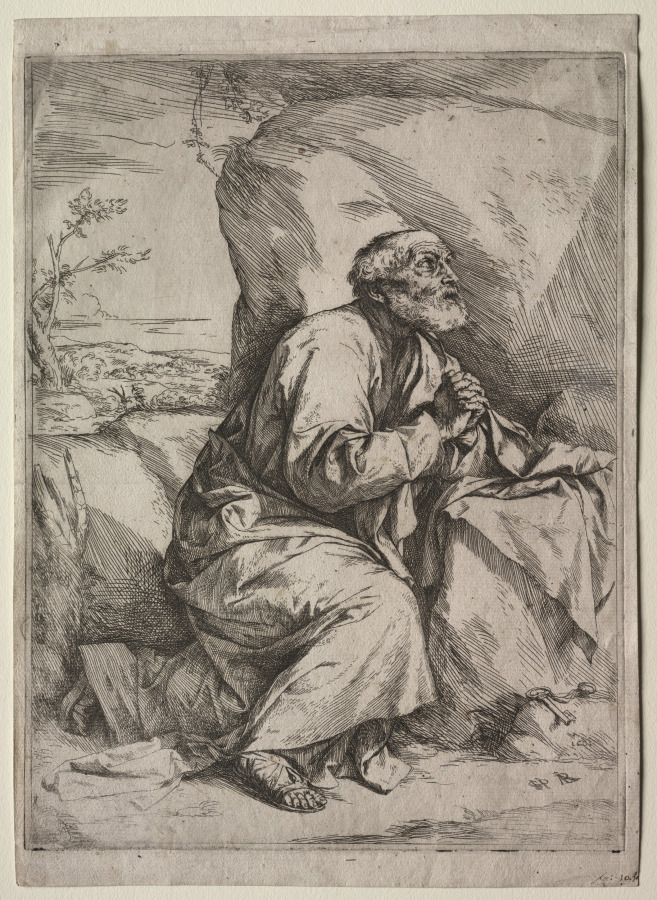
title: The Penitent St. Peter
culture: Spain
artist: Jusepe de Ribera (Spanish, 1591–1652)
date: c. 1621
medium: etching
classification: Print